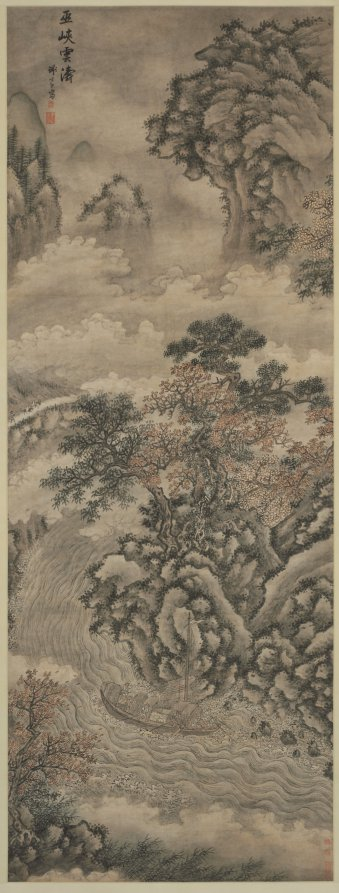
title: Clouds and Waves at the Wu Gorge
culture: China, Ming dynasty (1368–1644)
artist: Xie Shichen (Chinese, 1487–after 1567)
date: c. 1547–67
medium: hanging scroll; ink and light color on paper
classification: Painting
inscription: "巫峽雲濤" 謝時臣寫 [印] 姑蘇台下逸人; 樗仙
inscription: 5 additional seals of Cheng Qi 程琦 (1911–1988).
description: This dramatic landscape was probably painted after Xie Shichen returned from a journey in 1547 that took him through various provinces of China, including Sichuan Province in southwest China and sailing the Yangzi River. The composition from a high vantage point offers a view deep into the Wu Gorge where rolling waves put a ship in peril. The scale and composition of this landscape, which was inspired by the majestic mountain scenery in Sichuan Province, as well as Xie’s vigorous brushwork, are exceptional.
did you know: This large painting was likely created for a wealthy or powerful family's grand hall to impress their visitors.